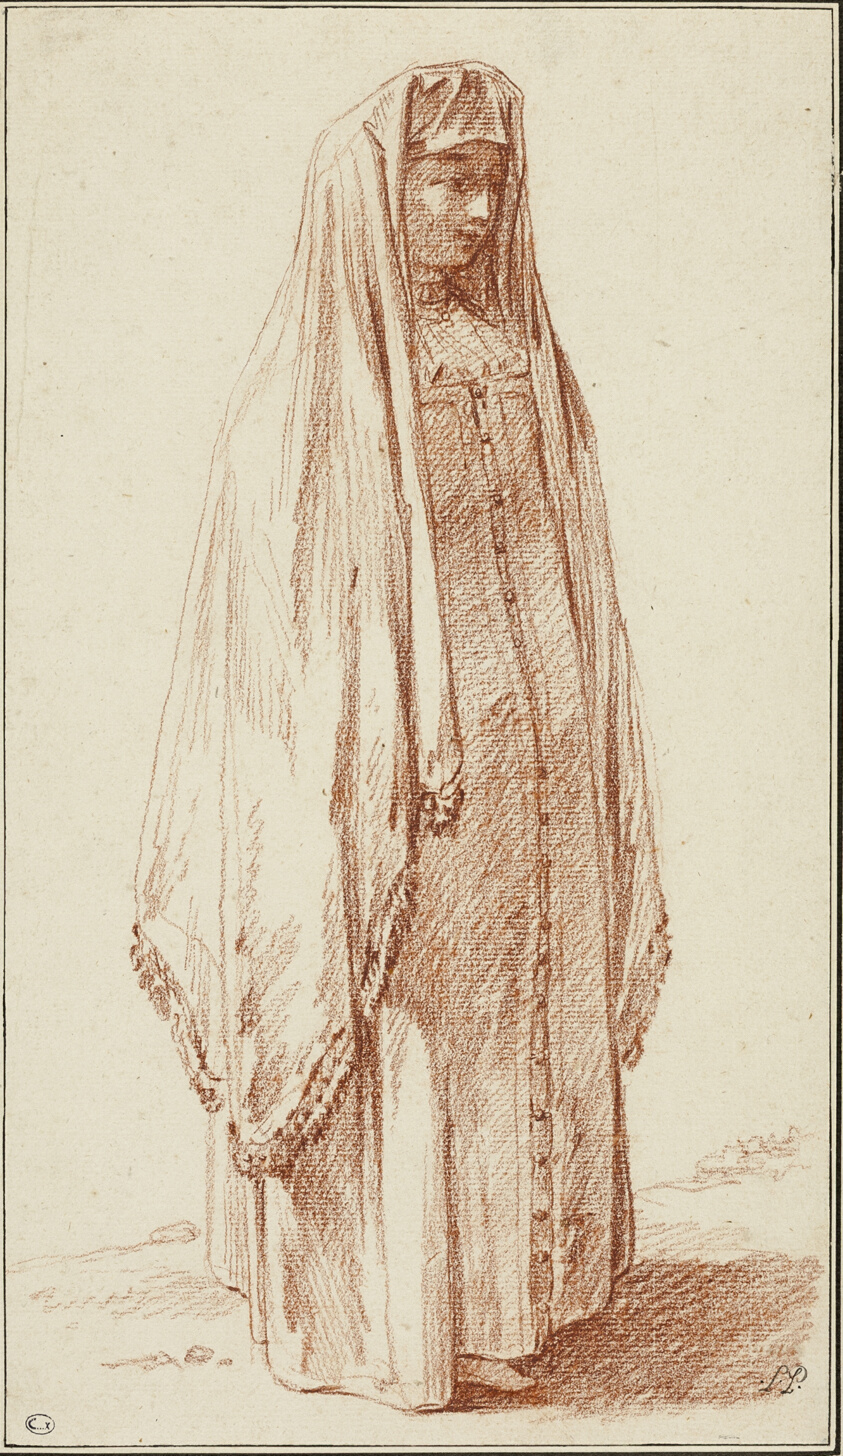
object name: Drawing and Watercolor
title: A Woman in Russian Dress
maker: Jean-Baptiste Le Prince; French, 1734-1781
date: 1780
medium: Red chalk on cream laid paper, laid down on cream laid paper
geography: France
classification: prints and drawing; chalk; drawings (visual works)